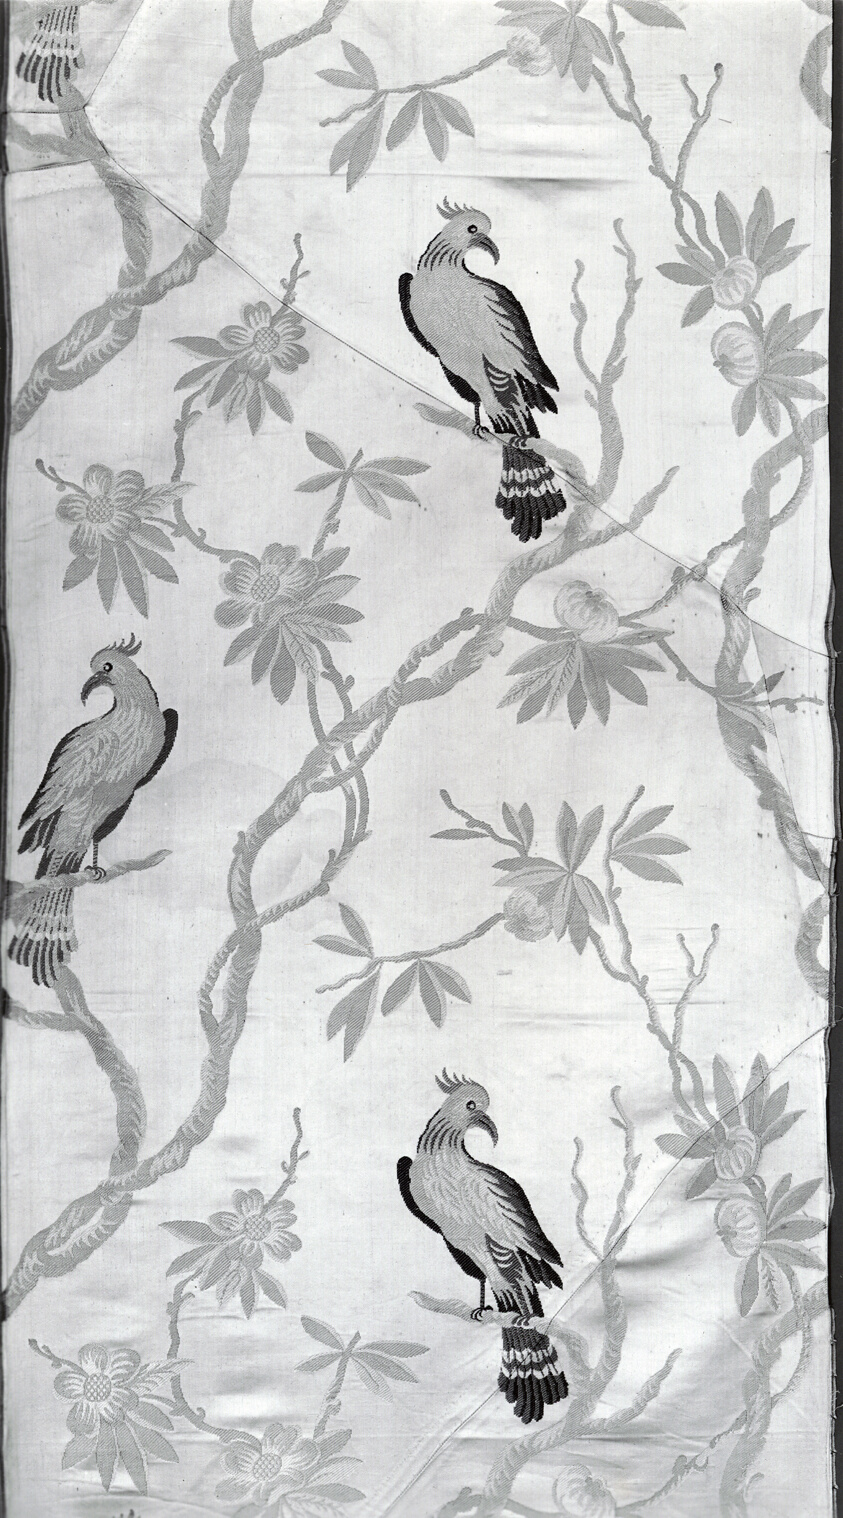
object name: Textile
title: Panel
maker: France, Lyon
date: Mid–18th century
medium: Silk, satin weave; brocaded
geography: Lyon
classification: textile; weaving